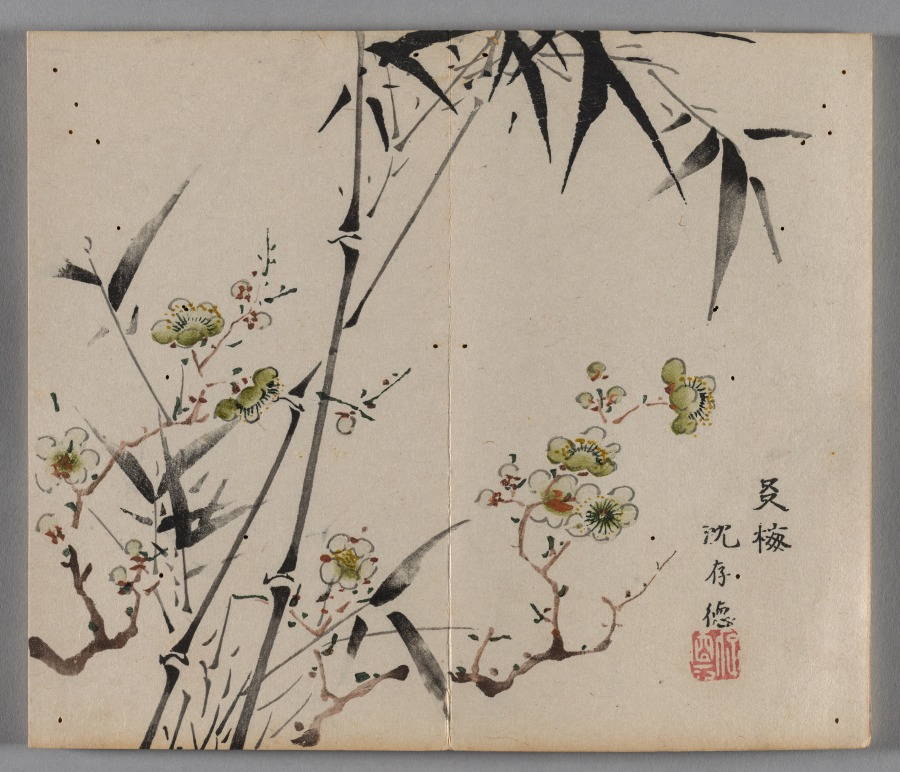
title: Ten Bamboo Studio Painting and Calligraphy Handbook (Shizhuzhai shuhua pu): Bamboo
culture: China, Qing dynasty (1644-1911)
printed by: Hu Zhengyan (Chinese, c. 1584–1674)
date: 1633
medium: Woodblock-printed book; ink and colors on paper; first edition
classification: Print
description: Color printing reached a level of perfection in the early 1600s, as seen in this Ten Bamboo Studio Collection of Calligraphy and Painting and the Mustard Seed Garden Manual of Painting (printed 1679 and 1701). The painterly quality, precision in registering (aligning) the woodblocks, and harmonious colors made them the most successful color print editions in Chinese history. Both editions were printed and compiled in Nanjing, spread nationwide, and had a great impact on the arts in Japan and Korea.